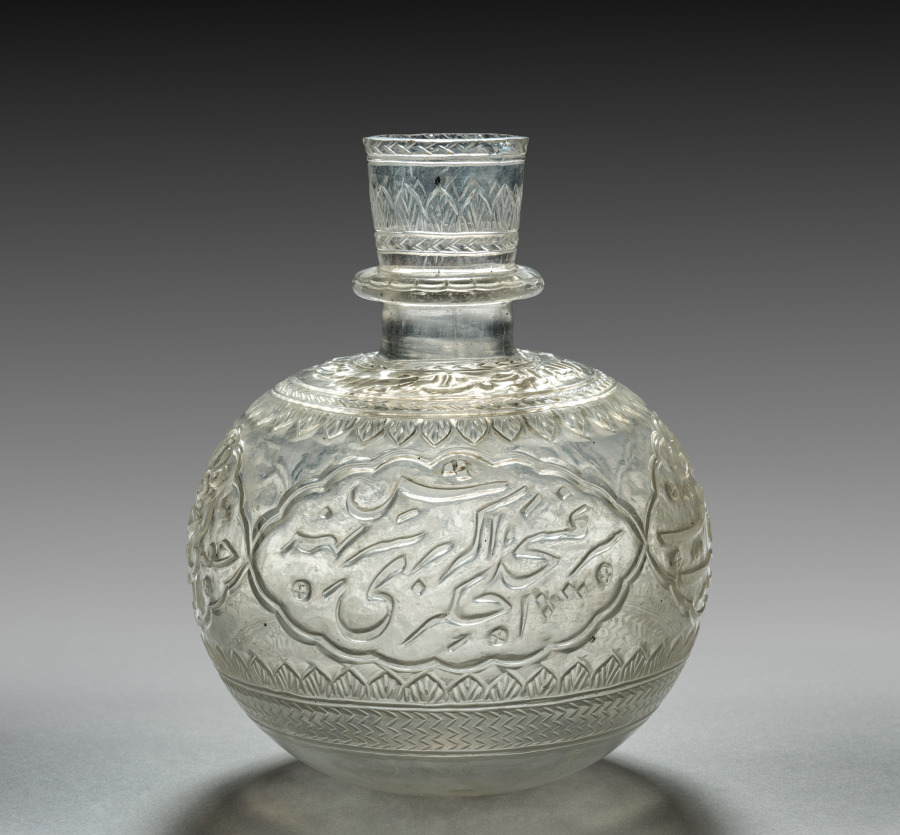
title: Hookah Bowl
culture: India, Mughal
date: 1700s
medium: glass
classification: Glass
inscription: Inscription in Farsi, on body: Even if live charcoal is placed on its head/ The hookah, a teacher of etiquette,/ will not respond unless drawn upon;/ Thus one can learn from its manners of refinement.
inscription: Inscription in Farsi, on shoulder: In the name of Allah the clement and merciful is the key to the wise treasure.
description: The inscription around the body of the base speaks to the use of the hookah in the decadent life of the Mughal court. The hookah is commended for being a proper, refined servant who will not “respond unless drawn upon” or, produce water bubbles when smoke is drawn through the hose. Undoubtedly the witty, poetic allusions would have been appreciated at banquets and other courtly gatherings. The use of wheel-cut glass for this hookah base may have been influenced by English glass and lead crystal that was exported to India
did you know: Around the top of this hookah bowl are incised the opening two lines from the Khamsa (Quintet) of the celebrated Persian poet Nizami (1141–1209).